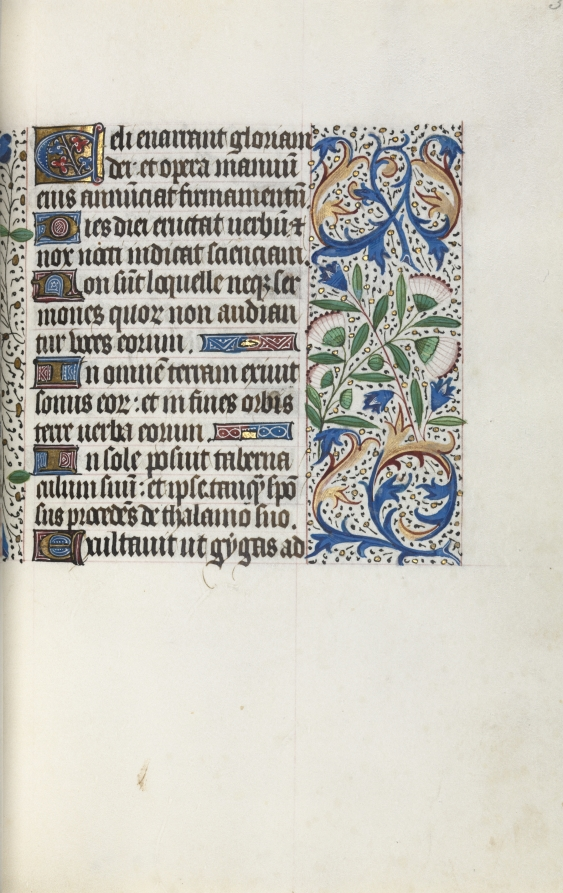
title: Book of Hours (Use of Rouen): fol. 32r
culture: France, Rouen, 15th century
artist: Master of the Geneva Latini (French, active Rouen, 1460–80)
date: c. 1470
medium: ink, tempera, and gold on vellum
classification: Bound Volume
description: In the late 1400s and early 1500s Rouen was an established and important center of book production. The city’s cathedral had a wealthy chapter that spent large sums of money to commission books and to maintain its extensive library. The stationers and booksellers would have likely been concentrated in or near the cathedral precinct. This artist, named after a manuscript now in Geneva, was Rouen’s principal illuminator during the second half of the 1400s.